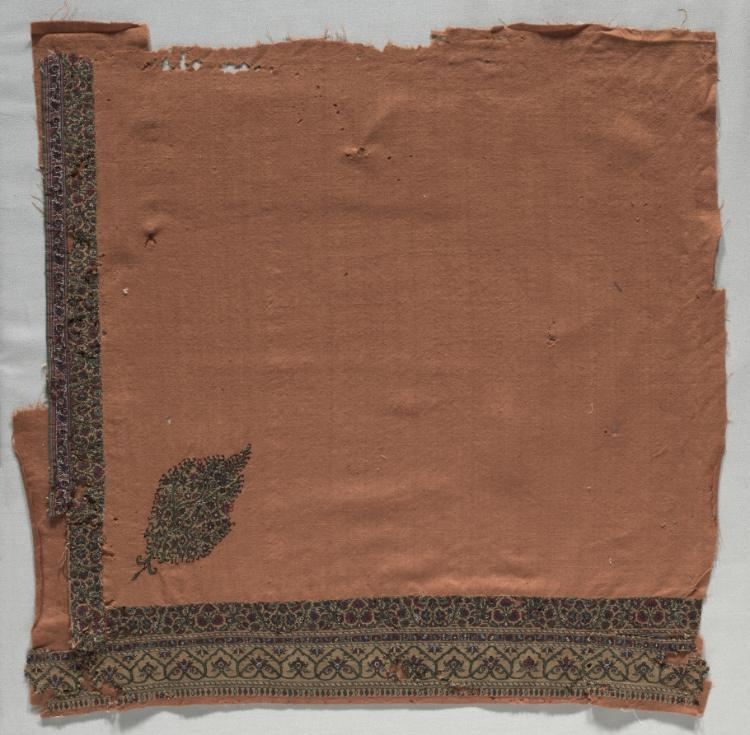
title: Corner of Fragment of a Shawl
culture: India, Kashmir, 20th century (?)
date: 1900–1924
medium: wool: tapestry twill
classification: Textile